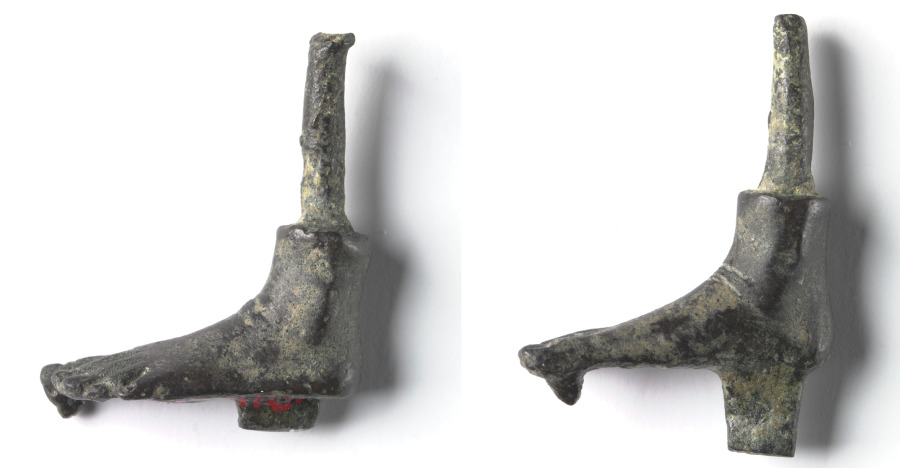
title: Bronze Mount from a "Shawabty Bundle": Pair of Feet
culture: Egypt, Thebes, Wadi Qubbanet el-Qirud, New Kingdom (1540–1069 BCE), Dynasties 18–19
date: c. 1336–1256 BCE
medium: bronze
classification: Funerary Equipment